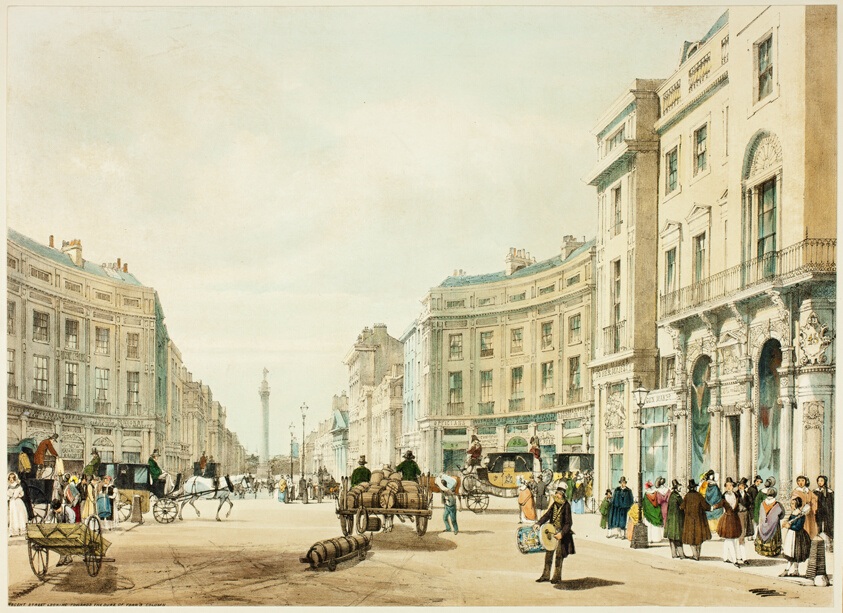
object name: Print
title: Regent Street Looking Towards the Duke of York's Column, plate twelve from Original Views of London as It Is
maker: Thomas Shotter Boys (English, 1803-1874); designed by Charles Ollier (English, 1788-1859)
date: 1842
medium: Hand-colored lithograph on paper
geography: England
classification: lithograph; print; prints and drawing